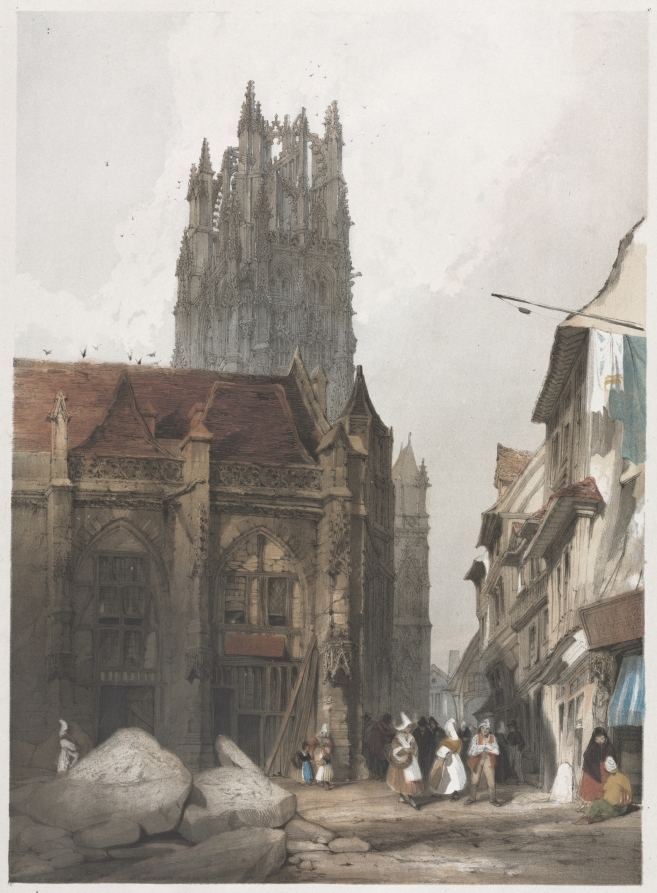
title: Picturesque Architecture in Paris, Ghent, Antwerp, Rouen: St. Laurent, Rouen, France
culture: England, 19th century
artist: Thomas Shotter Boys (British, 1803–1874)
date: 1839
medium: lithograph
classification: Portfolio